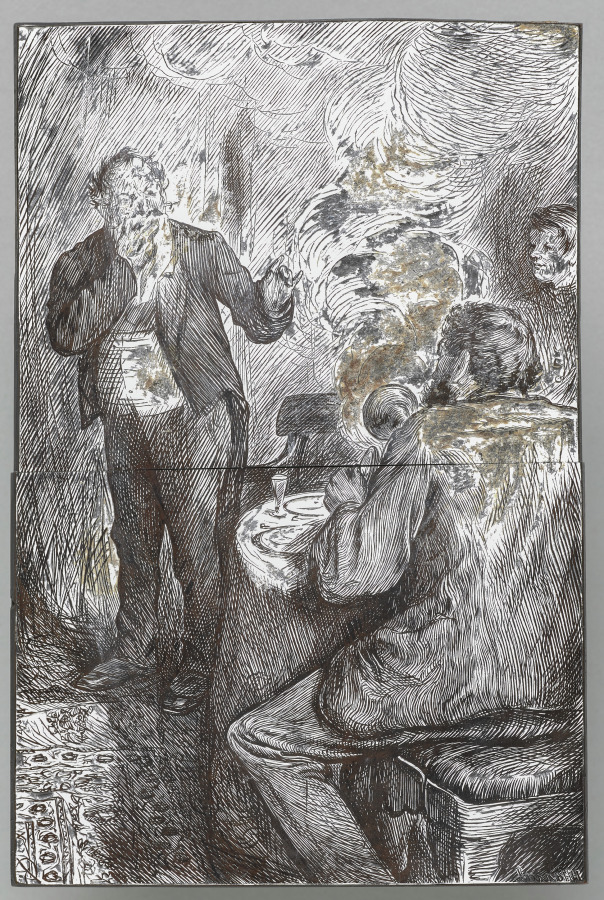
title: Smoking Strictly Prohibited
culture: England, 19th century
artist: Charles Samuel Keene (British, 1823–1891)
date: c. 1867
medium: woodblock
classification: Woodblock